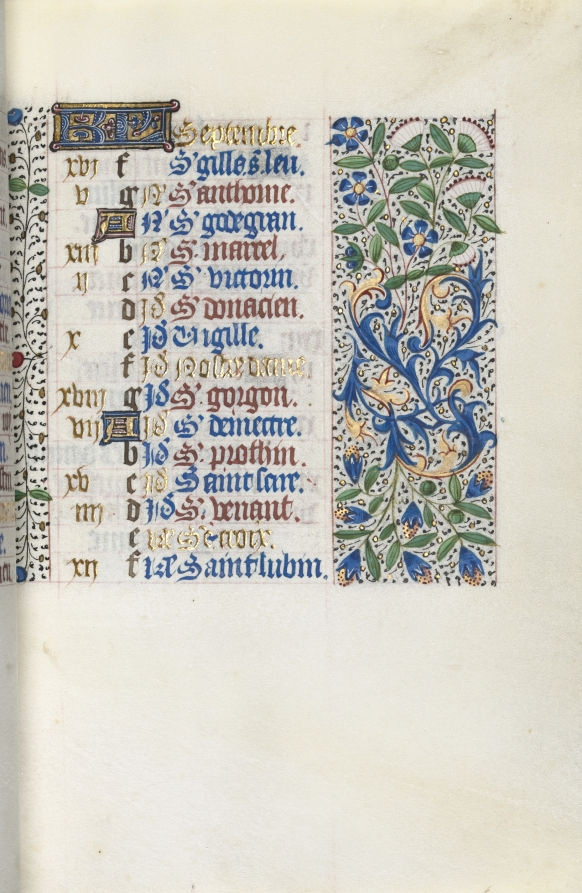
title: Book of Hours (Use of Rouen): fol. 9r, Calendar Page for September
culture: France, Rouen, 15th century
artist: Master of the Geneva Latini (French, active Rouen, 1460–80)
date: c. 1470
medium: ink, tempera, and gold on vellum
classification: Bound Volume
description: In the late 1400s and early 1500s Rouen was an established and important center of book production. The city’s cathedral had a wealthy chapter that spent large sums of money to commission books and to maintain its extensive library. The stationers and booksellers would have likely been concentrated in or near the cathedral precinct. This artist, named after a manuscript now in Geneva, was Rouen’s principal illuminator during the second half of the 1400s.